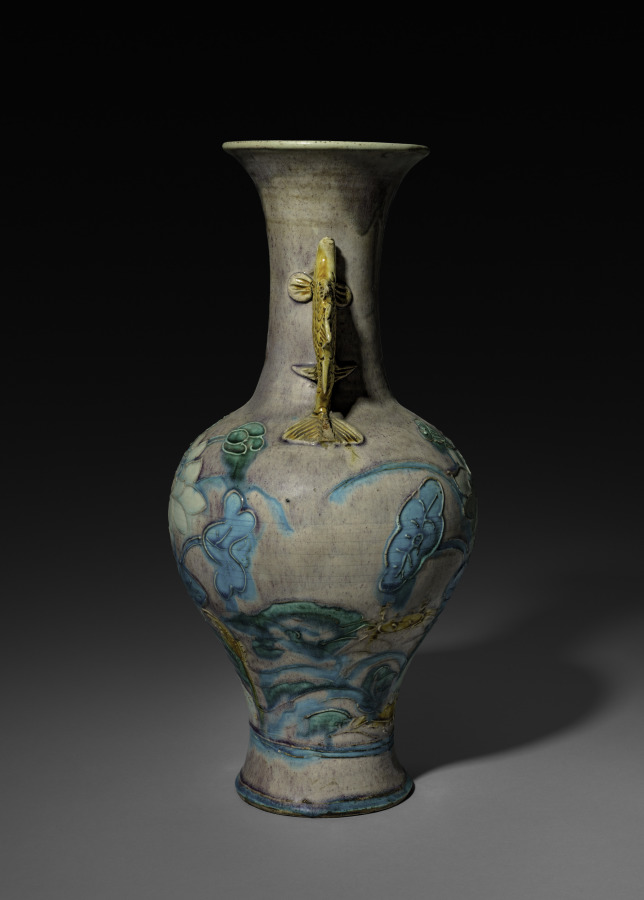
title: Beaker Vase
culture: China, Shanxi province, Ming dynasty (1368-1644)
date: 1368–1644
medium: Porcelain, Fahua ware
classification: Ceramic